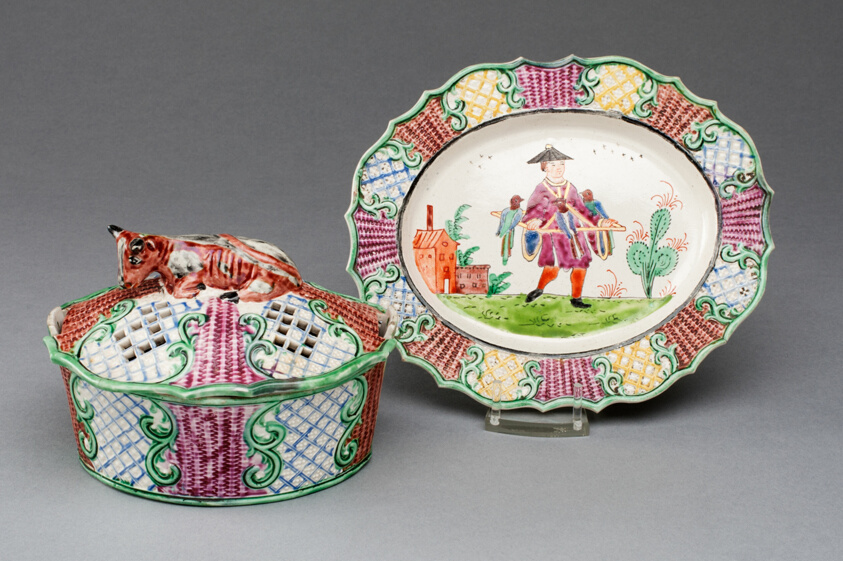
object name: Ceramics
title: Covered Butter Dish and Stand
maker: Staffordshire, England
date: c. 1760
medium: Salt-glazed stoneware, polychrome enamels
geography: Staffordshire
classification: vessel for serving food; dish (vessel); european decorative arts; ceramics; stoneware; salt-glazed stoneware